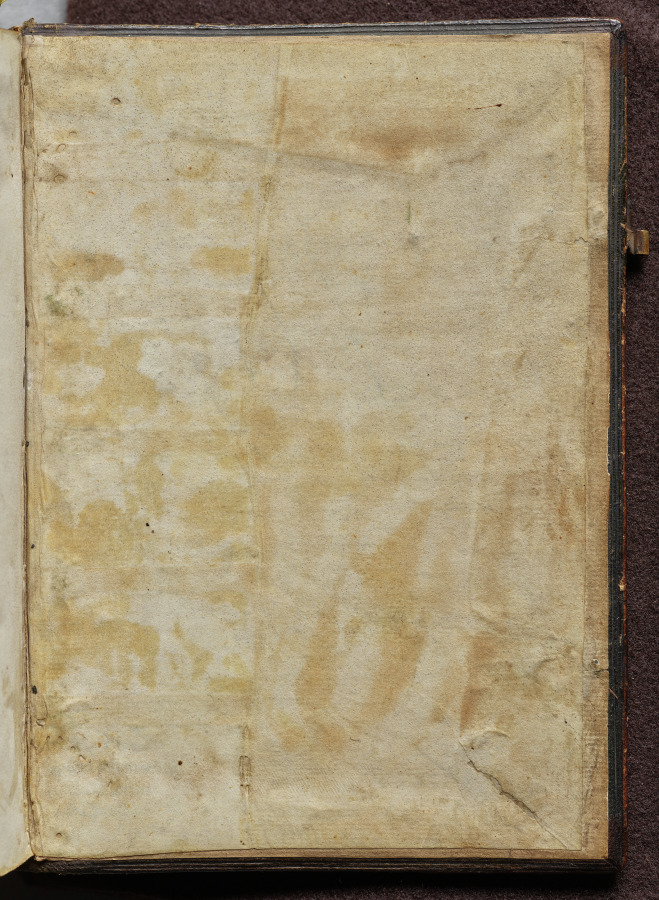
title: Hours of Charles the Noble, King of Navarre (1361-1425)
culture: France, Paris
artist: Master of the Brussels Initials and Associates (French)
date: c. 1404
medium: ink, tempera, and gold on vellum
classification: Bound Volume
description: Creating a book of hours was an arduous and costly process. These books were made from vellum, animal skins that were laboriously prepared in a multistep process. The texts were written with a quill pen and the illustrations were hand painted using water-based pigments. Gold was added for a look of great luxury. Such a book would take years to create, making these valuable objects unique.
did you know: King Charles the Noble likely used this book of hours at his royal castle of Olite in Navarra in northern Spain.